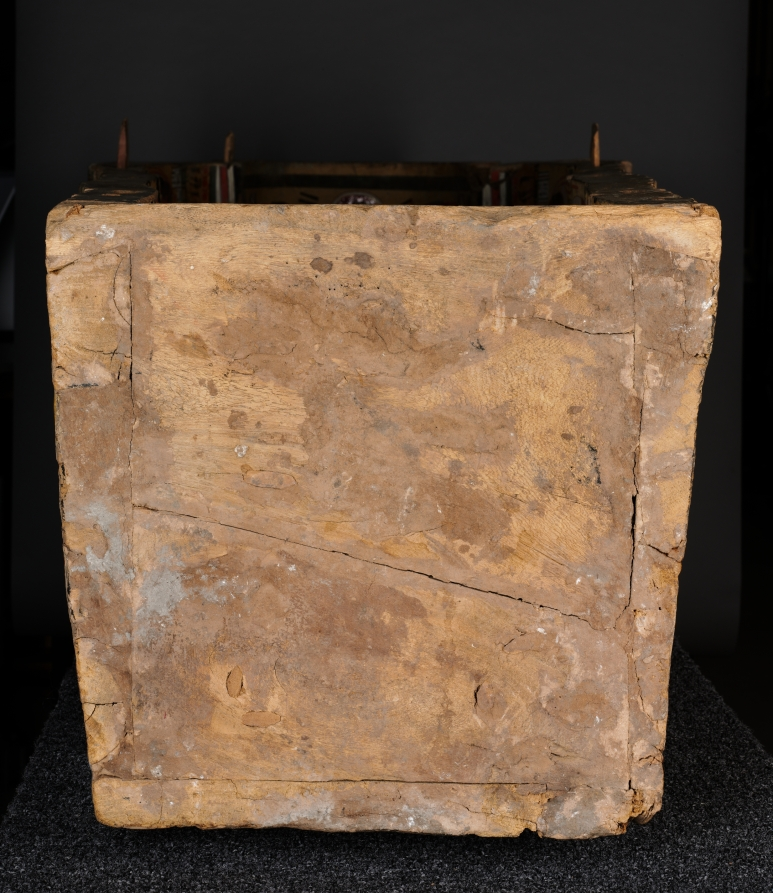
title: Coffin of Nesykhonsu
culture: Egypt, Thebes, Third Intermediate (1069–715 BCE), Dynasties 21–22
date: c. 976–889 BCE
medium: gessoed and painted sycamore fig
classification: Funerary Equipment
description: Egyptian coffins told stories and illustrated spells to help the deceased transition safely to the afterlife. Inside Nesykhonsu's coffin there are two jackals, one facing right and the other left, near the top. Here, the jackal represents the powerful deity Anubis, the god of the afterlife and embalming.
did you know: Two of Nesykhonsu's titles, "Lady of the House" and "Singer of the Choir of Mut the Great," are written on the outside of the coffin.